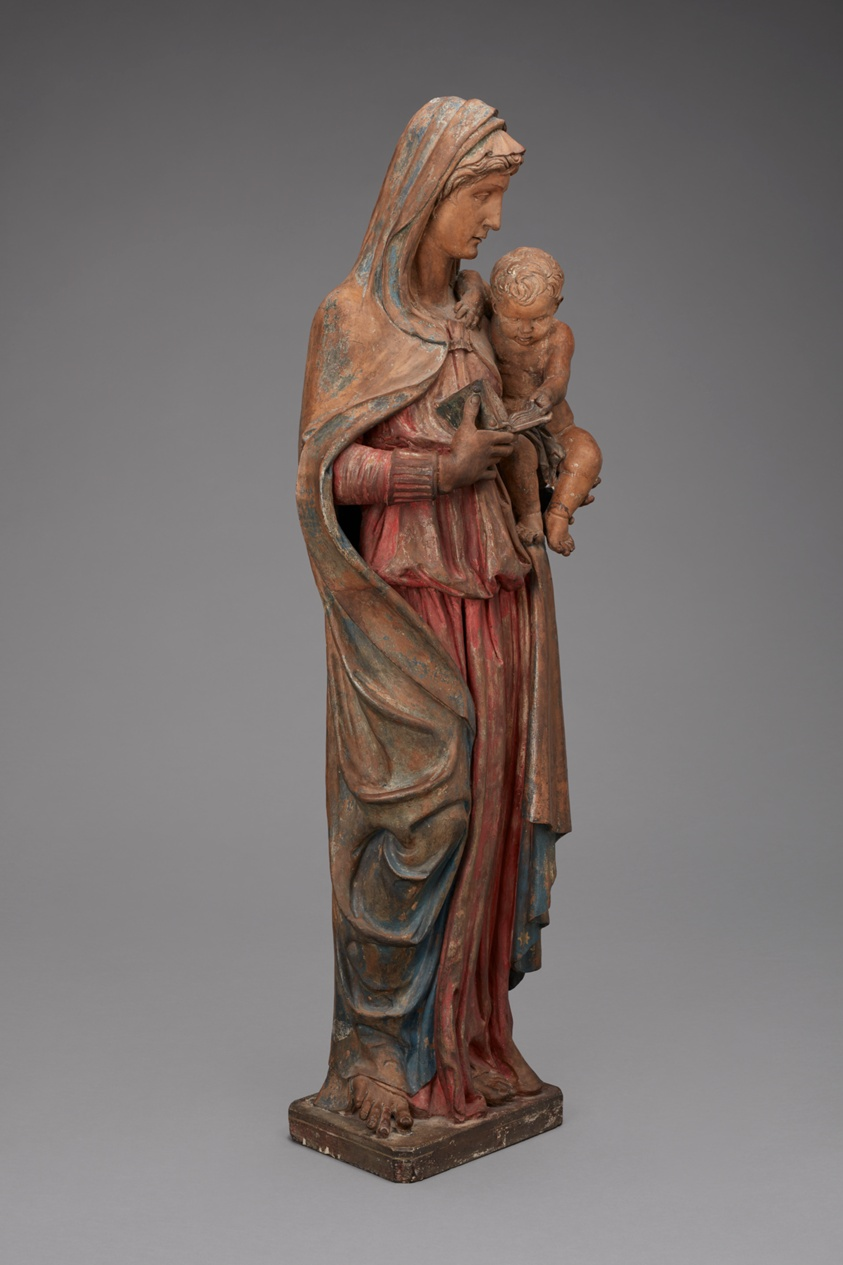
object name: Sculpture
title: Virgin and Child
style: sixteenth century, 16th Century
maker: Central Italian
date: c. 1500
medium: Pigmented terracotta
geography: Central Italy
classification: large scale; sculpture; Italian; terracotta (sculpture)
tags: Virgin and child/Madonna and child, Christianity, Christian subjects, religious figures, religious, religion, woman with children, woman, babies, child, mother and child, mother, Jesus, Virgin Mary